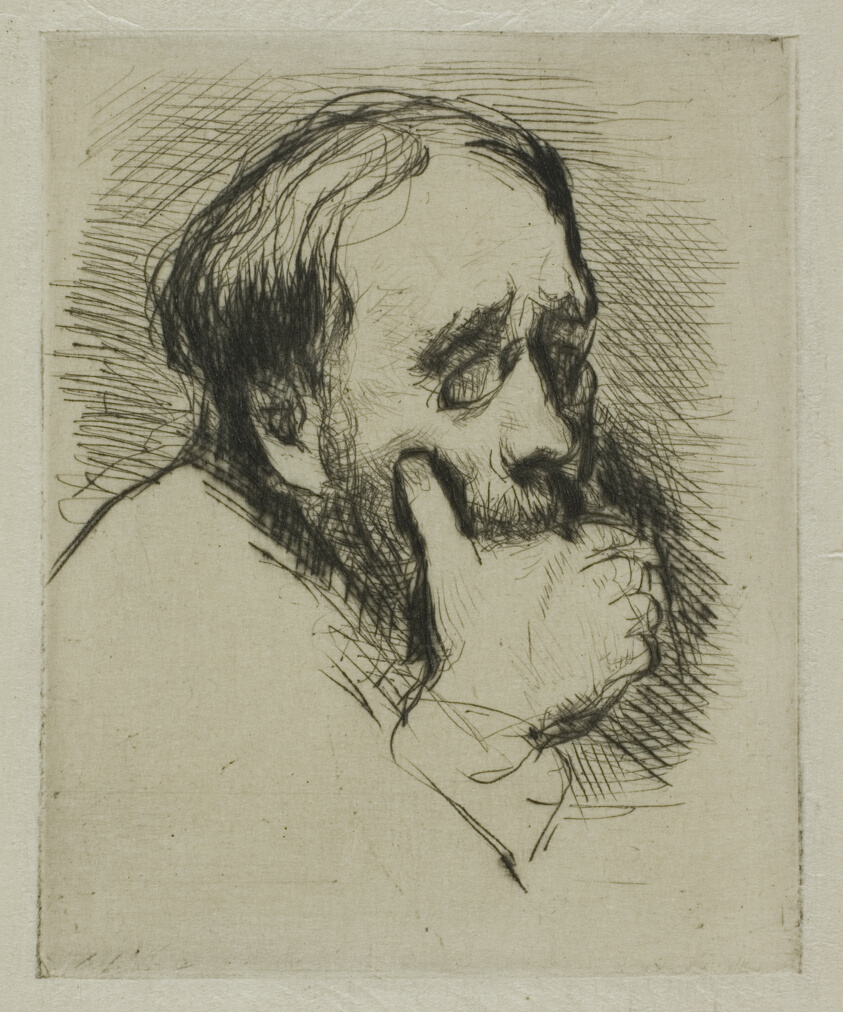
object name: Print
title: Portrait of Degas, His Hand Over his Mouth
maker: Marcellin Gilbert Desboutin (French, 1823-1902)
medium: Drypoint on ivory wove paper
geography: France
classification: drypoint; print; prints and drawing